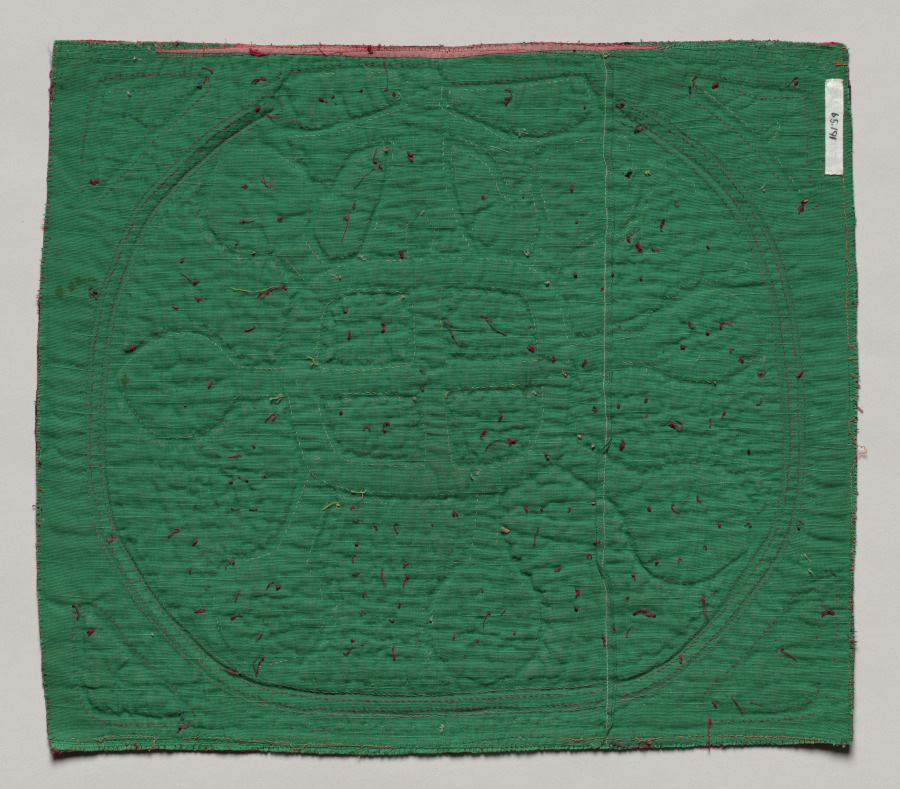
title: Mola Panel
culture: Republic of Panamá, Gunayala Comarca, Guna people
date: mid 1900s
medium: cotton, reverse applique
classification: Textile